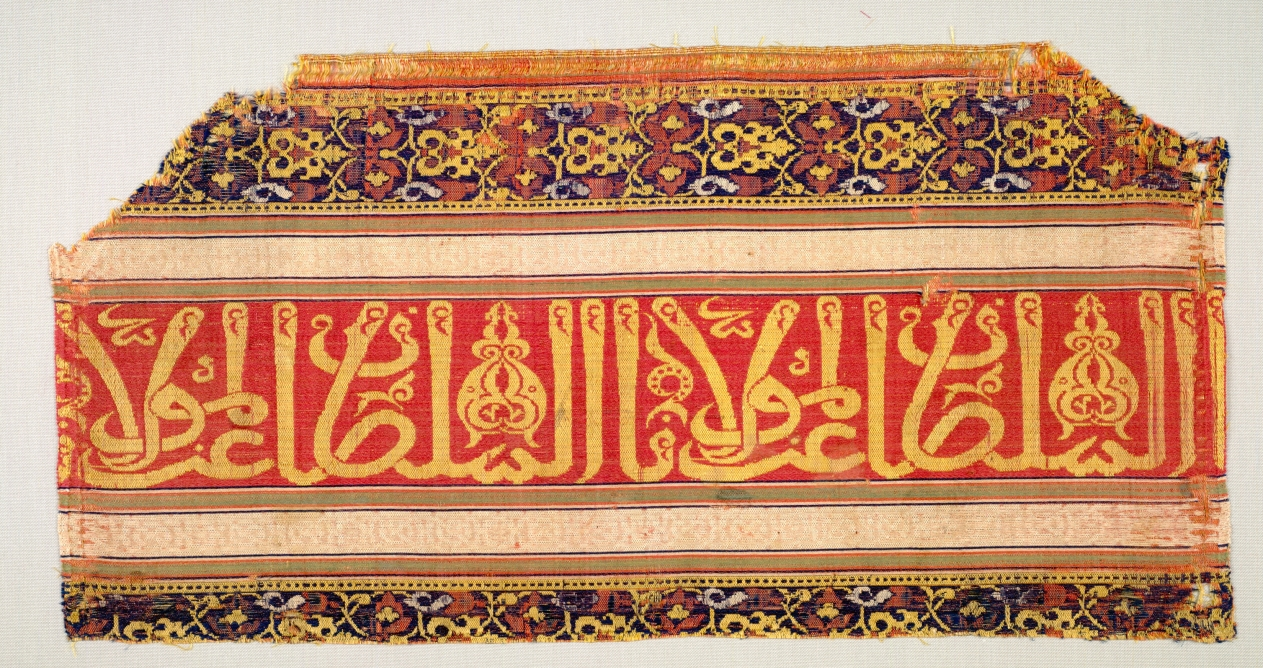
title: Striped Silk from a Garment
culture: Spain, Granada, Nasrid period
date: 1400s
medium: silk; lampas weave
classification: Textile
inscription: Naskhi inscription: "Glory to our Lord the Sultan."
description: Arabic inscriptions had religious significance to viewers regardless of their legibility. This text repeats "Glory to our Lord the Sultan," a phrase that also enhances the Alhambra Palace walls. For Muslims, Arabic texts symbolized the divine revelation of God’s word to the Prophet Muhammad and recorded in the holy Qur’an; for Spanish Catholics it represented the Holy Land. In striped silks, inscriptions often alternate with interlacing bands and palmettes. Inscribed silks have survived as Catholic church vestments.